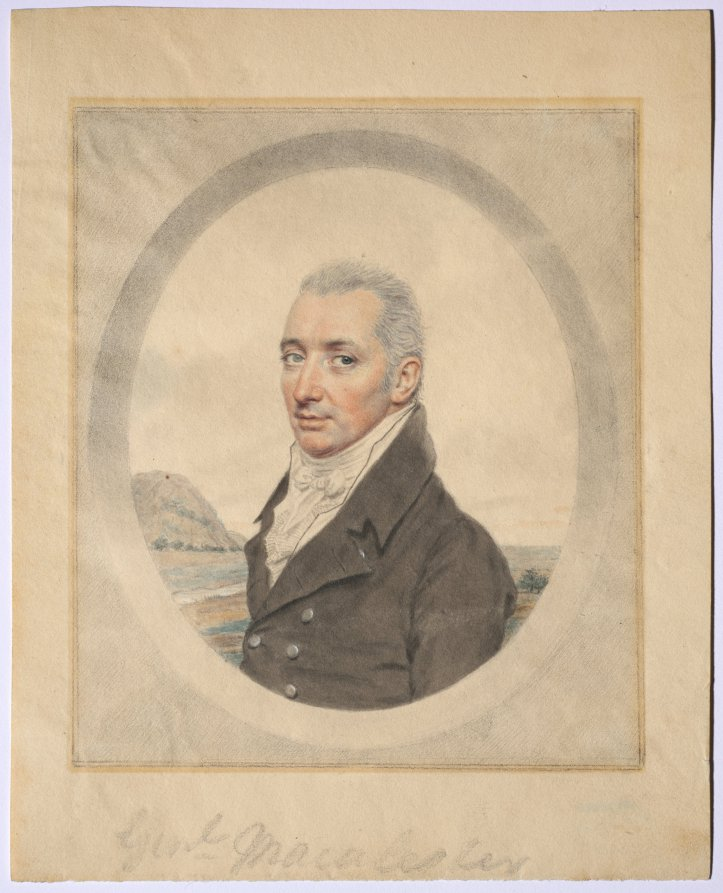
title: Portrait of General Keith MacAlister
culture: England, 18th century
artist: John I Smart (British, 1741–1811)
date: c. 1800–1810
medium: watercolor and graphite, heightened with traces of white gouache, on paper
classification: Portrait Miniature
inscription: across bottom, in graphite: Genl Macalester ; VERSO, center, in graphite: 169; lower left, in graphite: l. 159. [circled]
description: Although it is impossible to say if it was always part of the artist’s process to execute a preparatory sketch prior to painting each miniature, we do know that John Smart retained many hundreds of these sketches. A great number were inherited by his son John James Smart, who in turn left them to his daughter Mary Ann Bose. Upon her death in 1934, they were divided between three of her children: William Henry Bose, Lilian Dyer, and Mabel Annie Busteed. General MacAlister is represented in three-quarter view, bust length, and facing the right. His eyes are blue, but the right eye is clouded and lighter in color than the left. There is no sign of isolated damage or fading, confirming that this color difference was among MacAlister’s physical attributes. He wears a brown coat; white, frilled vest edged in black; tall collar; and a white cravat tied in a bow. His closely cropped hair is powdered, and an unidentified rocky landscape through which a small river runs is painted in the background; it probably represents a place of personal significance in Scotland or India, possibly even Seringapatam and the Cauvery River. Smart depicted MacAlister inside of a penciled oval tromp l’oeil frame. The drawing is replete with physically informative details and is larger and more finished than drawings intended to function exclusively as preparatory sketches, though it may also have served this purpose. Beneath the elaborate penciled border is written in large graphite script “Genl Macalester.” This inscription is not in the artist’s hand and almost certainly a later addition. A Colnaghi label was removed from the verso after the work entered the museum’s collection. The sitter is likely Major-General Keith MacAlister (1746–1820) of the Madras Cavalry. He was the eldest of three soldier brothers who served with distinction in India. MacAlister was born at Skerrinish in the Isle of Skye and ascended through the ranks rapidly following his appointment as cadet in 1777. He became captain in 1796; lieutenant-colonel in 1799; colonel in 1809; and major-general in 1812. He is celebrated particularly for his role in the 1799 storming and capture of Seringapatam, a decisive battleground in the Fourth Anglo-Mysore War, and for rescuing his brother Matthew from a long imprisonment in the same city. MacAlister was also instrumental in organizing the Madras Light Cavalry.5 Smart’s portrait of MacAlister would have been painted between 1800 and 1810, when the sitter was an older man and had returned to England before settling in Scotland. The Nelson-Atkins Museum of Art owns a Smart portrait on ivory called Keith Michael Alexander, dated 1810. Although he wears a military uniform rather than civilian clothes, the sitter is identical to the one in the Cleveland drawing—note in particular the differently colored eyes and the blue veins at the left temple. Although it was painted in 1810, possibly some years after the Cleveland sketch, the sitter’s hair loss is more pronounced in the earlier drawing. This inconsistency can be explained by the fact that Regency fashion called for men to comb their hair forward, thereby obscuring baldness, as seen here. Otherwise, the portraits are so similar that it is likely that Smart was consulting the earlier finished drawing when executing the 1810 miniature in ivory. Both “General Macalister” and “Colonel Keith Michael Alexander” are listed by Daphne Foskett among Smart’s sitters, but she reproduces images only of the latter Nelson-Atkins miniature. No additional portraits of the period depicting gentlemen of either name have been discovered at this time. The Nelson-Atkins ivory has been called Keith Michael Alexander by tradition at least since it was in the Mr. and Mrs. John W. Starr collection before entering the museum in 1958. However, the miniature has not been removed from the frame since its acquisition, and there is no evidence of an inscription. It is likely that Keith Michael Alexander is a mistaken interpretation of the name Keith MacAlister, particularly because no record of a soldier by the name of Keith Michael Alexander has been discovered.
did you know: Sketches helped John Smart work out the particulars of a portrait before commencing the miniature on ivory; they were useful in the event that a duplicate might later be required.